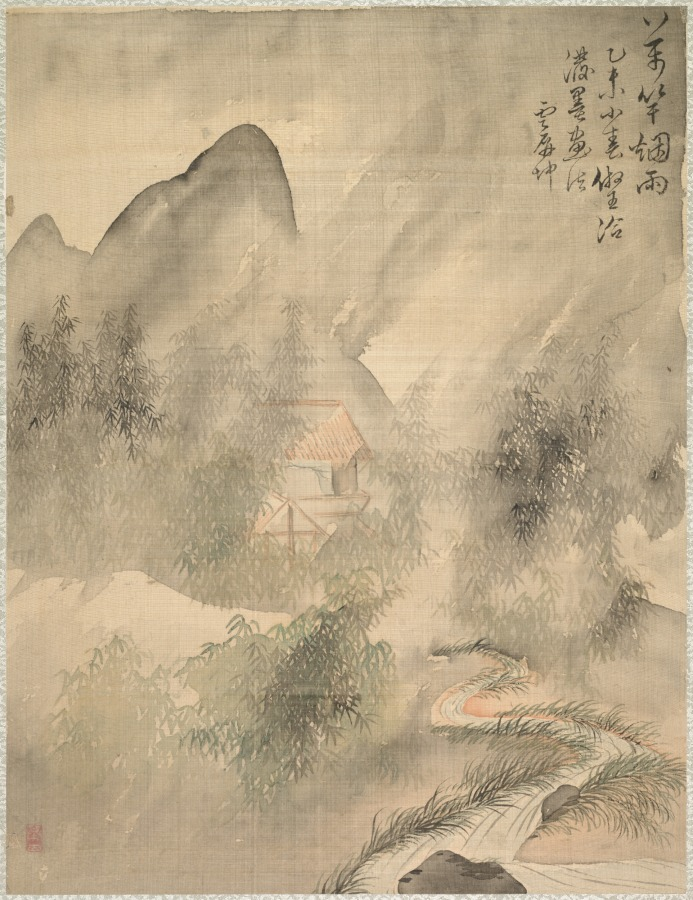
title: Ten Thousand Bamboos in the Mist and Rain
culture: Japan, Edo period (1615–1868)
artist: Tsubaki Chinzan (Japanese, 1801–1854)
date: 1847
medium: album leaf; ink and color on silk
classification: Portfolio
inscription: Tsubaki Chinzan inscribed each leaf with the same inscription that Zhai Dakun wrote on his album leaves.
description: As the title of this album suggests, Tsubaki Chinzan painted each of the landscapes included in the album after interpretations of the styles of old masters by Chinese painter Zhai Dakun (翟大坤, active 1730–1804). In addition to the painted compositions, he also copied the inscriptions on Zhai Dakun's paintings.